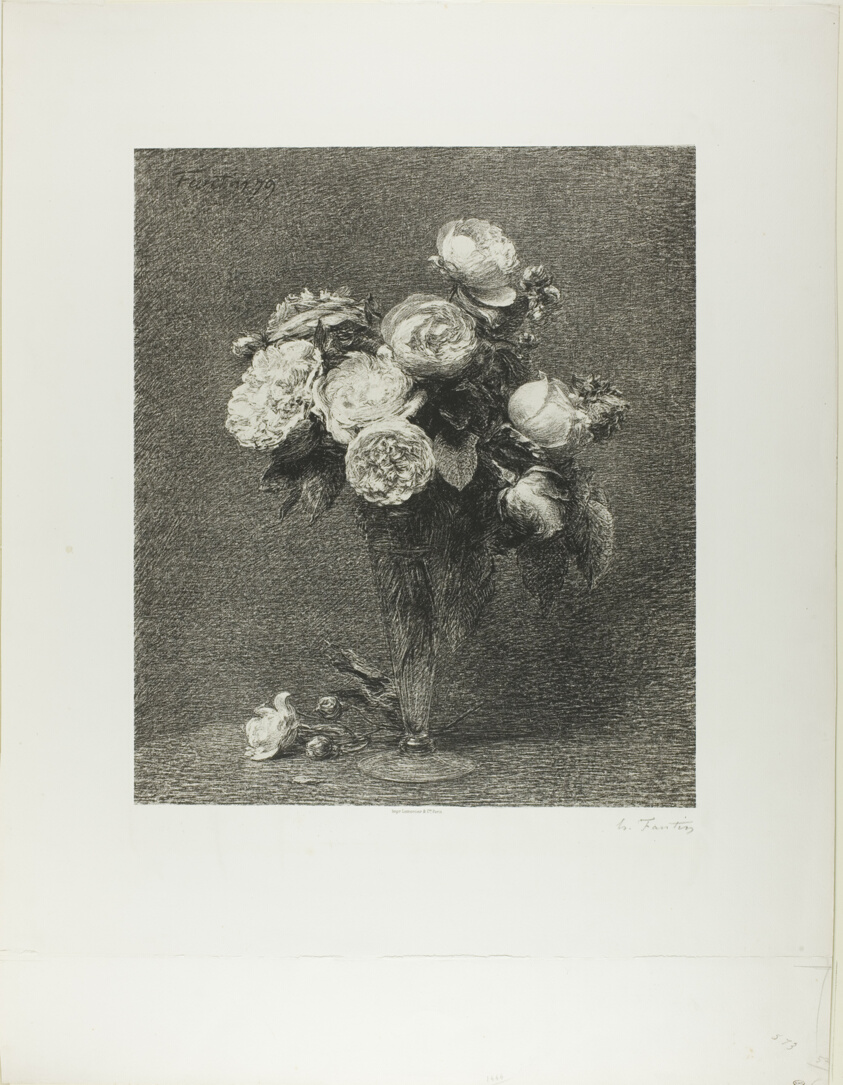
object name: Print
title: Bouquet of Roses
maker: Henri Fantin-Latour (French, 1836-1904)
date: 1879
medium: Lithograph in black on off-white China paper laid down on white wove paper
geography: France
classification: lithograph; print; prints and drawing